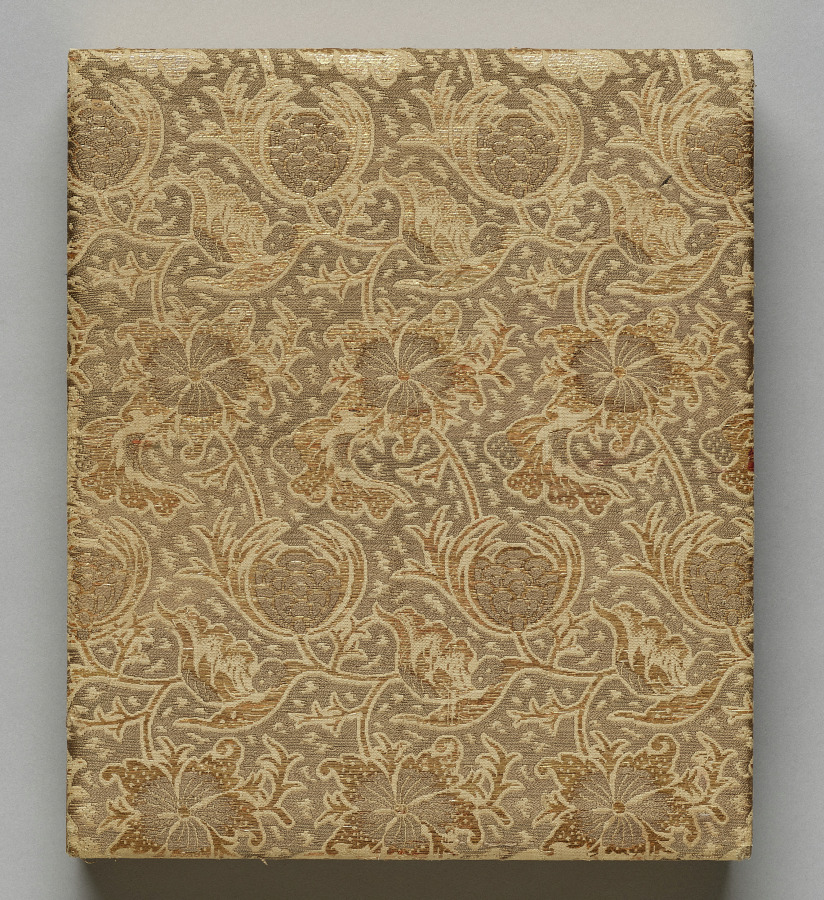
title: Album of Illustrations for the Tale of Genji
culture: Japan, Edo period (1615–1868)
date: 1600s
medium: Double-sided accordion-style album of 17 leaves; ink, light color, and gold on paper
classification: Bound Volume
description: This album contains illustrations for the classic literary work the Tale of Genji, authored in the 1000s by Murasaki Shikibu, an aristocrat of the Heian period (794–1185) court. The scenes are painted in the “white drawing” (hakubyō) mode, in which a fine ink line is used to depict figures and spaces with great subtlety, punctuated only occasionally by traces of red pigment for a character’s lips, a detail of a garment, or a decorative element. These two scenes illustrate episodes from the chapters “Thin Veil of Cloud” (Usugumo) and “Barrier Gate” (Sekiya).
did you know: The illustrations are identified by chapter title in cartouches to the upper right of the paintings.